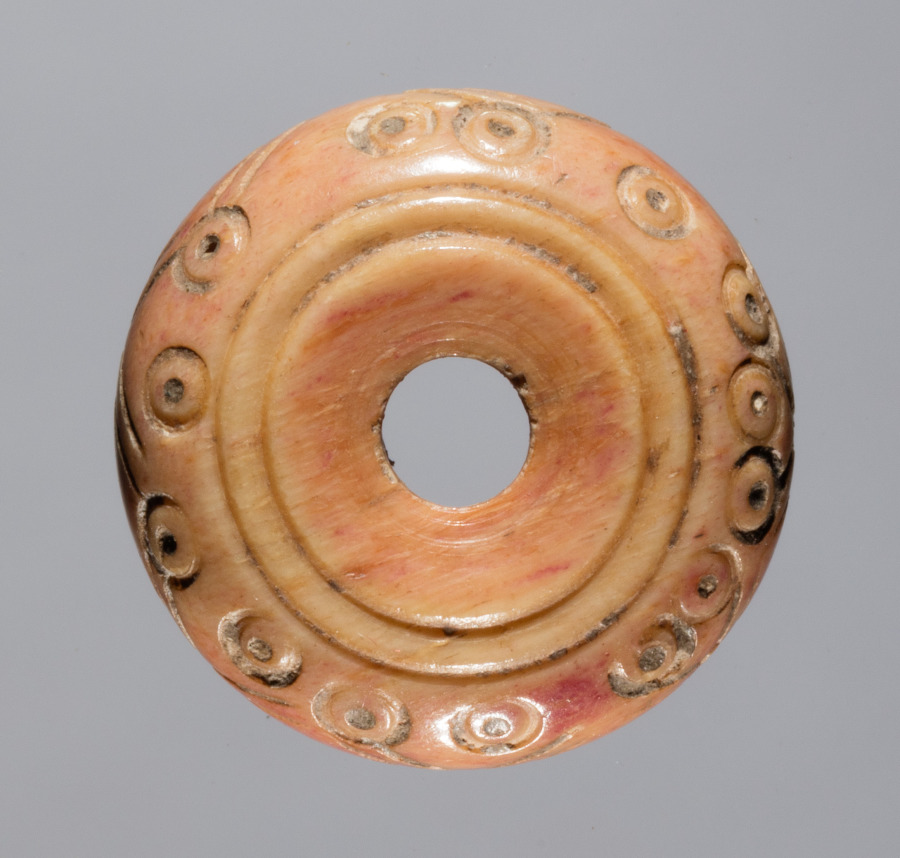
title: Spindle Whorl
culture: Iran, early Islamic period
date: 700s - 900s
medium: bone, incised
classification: Spindle Whorl